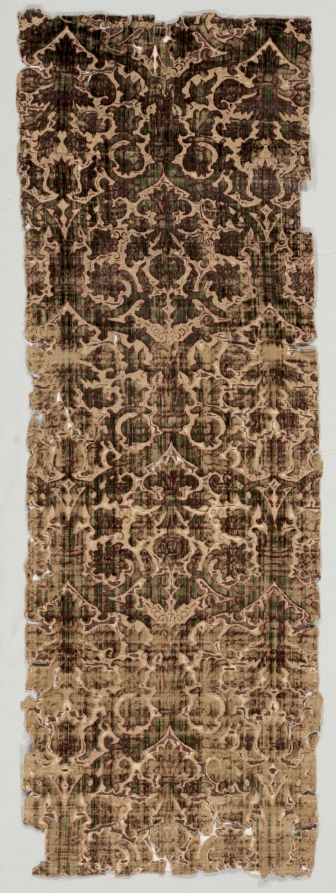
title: Length of Velvet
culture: Italy, 16th century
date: 1500s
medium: velvet (cut and voided); silk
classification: Velvet